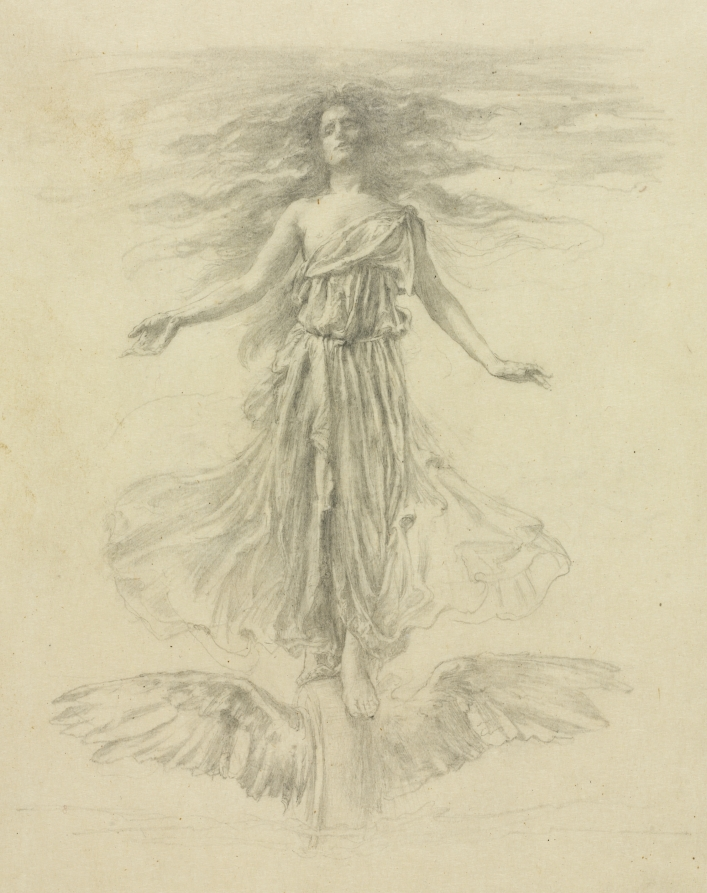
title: Fortune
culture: America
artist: John La Farge (American, 1835–1910)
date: 1901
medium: graphite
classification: Drawing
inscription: signed, lower right, in graphite: JLF. [illeglible]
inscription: signed, lower lef, in graphite: A [?] B[illegible]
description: When commissioned in 1901 to make a stained glass window for the Frick office building in Pittsburgh, John La Farge produced this strange design of Fortune balancing precariously on a wheel—an emblem of the fickleness of fortune. The hazy, mysterious handling of the face of the central figure recalls contemporary French Symbolist painters such as Odilon Redon (1840–1916).